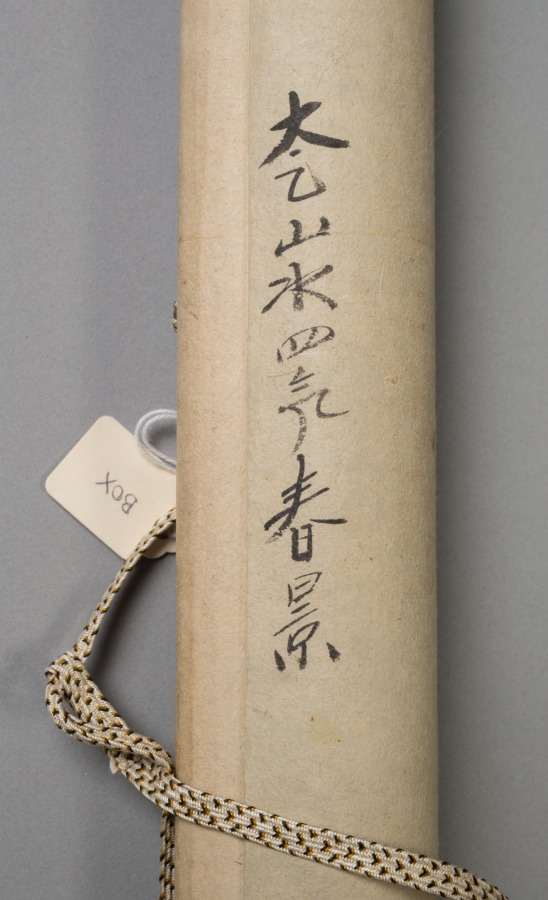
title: Casually Created on a Spring Day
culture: Japan, Edo period (1615–1868) to Meiji period (1868–1912)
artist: Murase Taiitsu (Japanese, 1803–1881)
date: c. 1825–81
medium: hanging scroll; ink on paper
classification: Painting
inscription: artist's inscription, signature, and seal at top of painting.